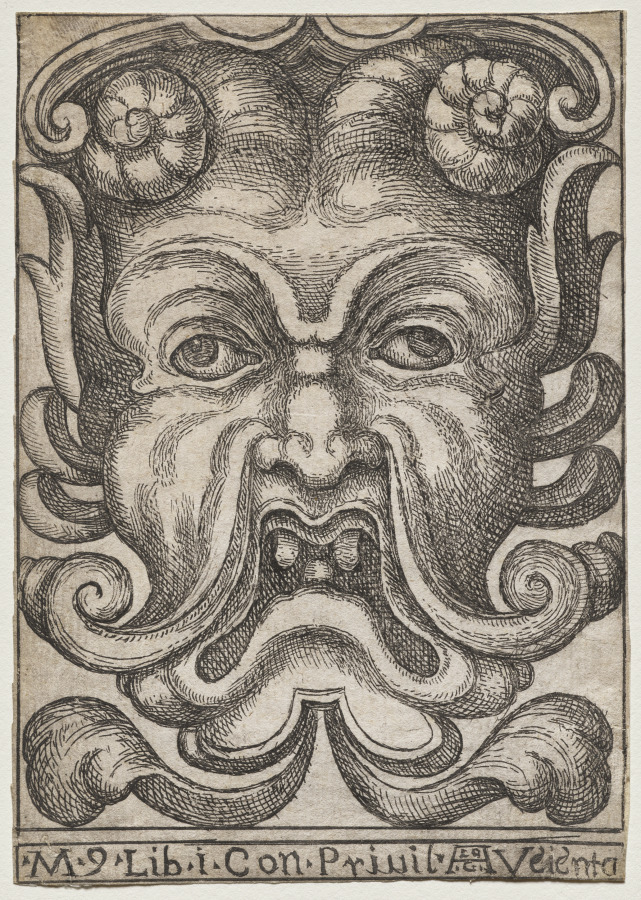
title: Grotesque Masks: Mask 9, Book I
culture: Italy, 17th century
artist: Aloisio Giovannoli (Italian, 1550–1618)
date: c. 1610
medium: etching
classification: Print